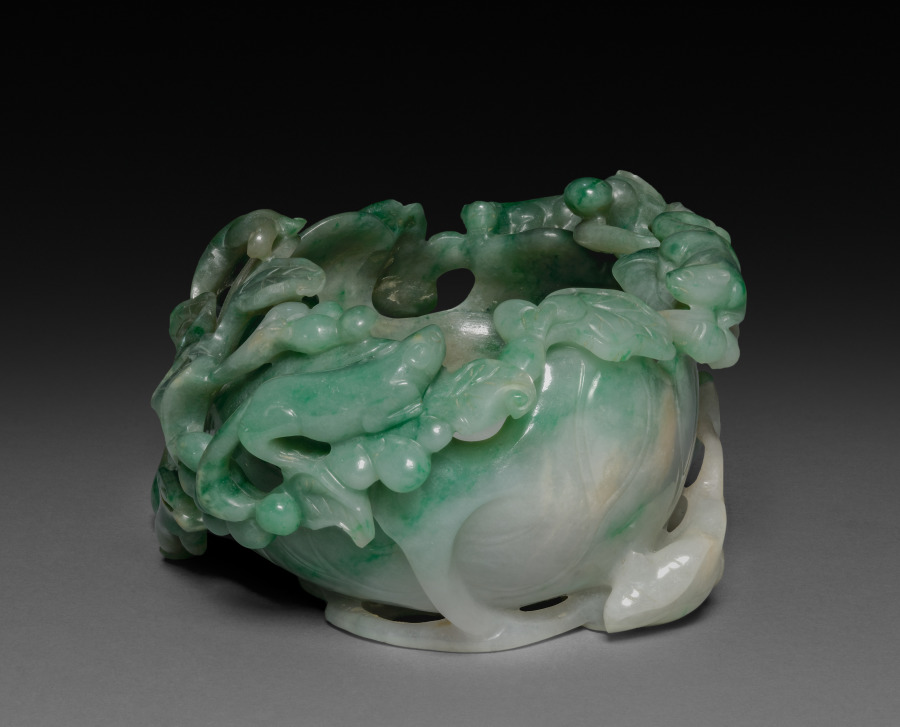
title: Brushwasher in Shape of Lotus Leaf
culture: China, Qing dynasty (1644-1911)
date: 19th Century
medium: translucent jadeite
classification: Jade